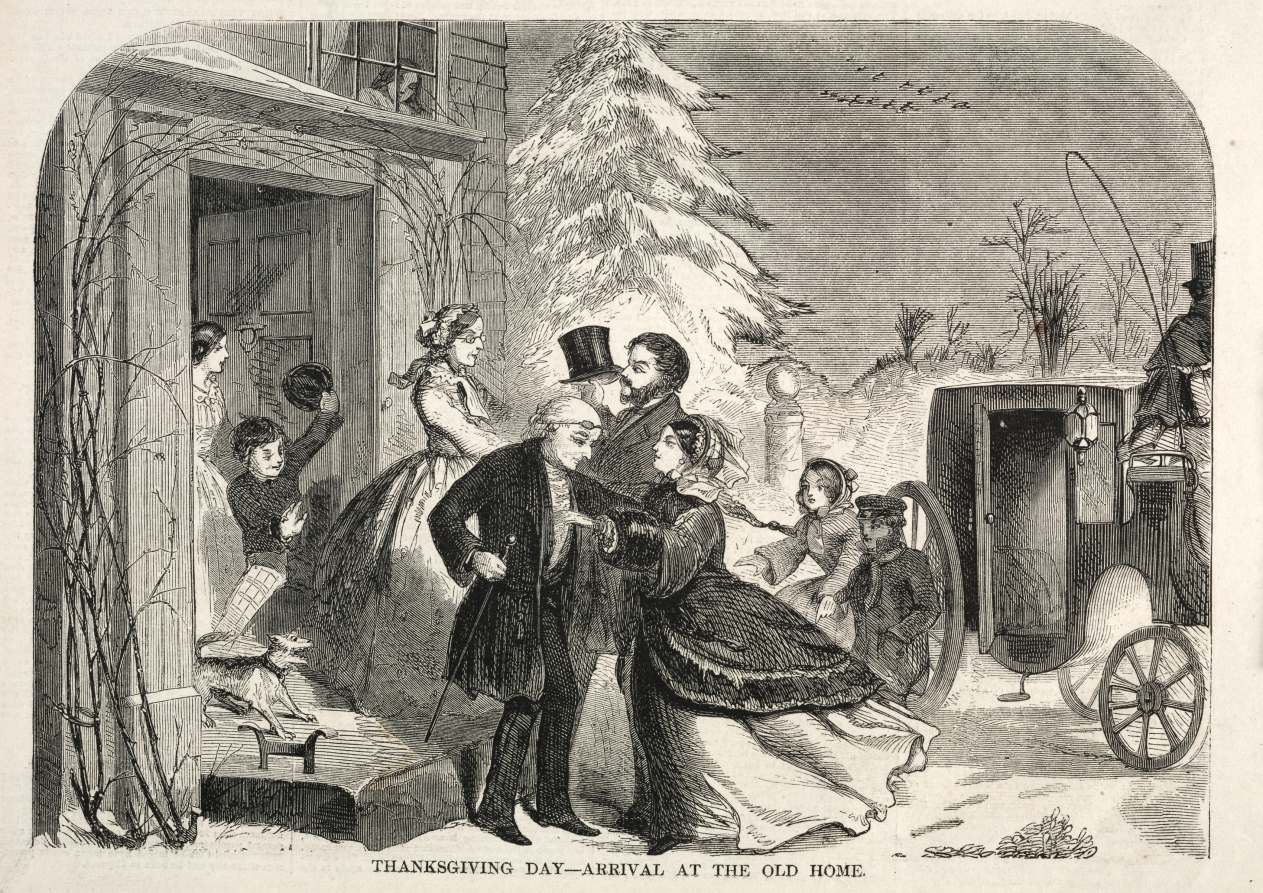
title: Thanksgiving Day - Arrival at the Old Home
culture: America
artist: Winslow Homer (American, 1836–1910)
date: 1858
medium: wood engraving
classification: Print